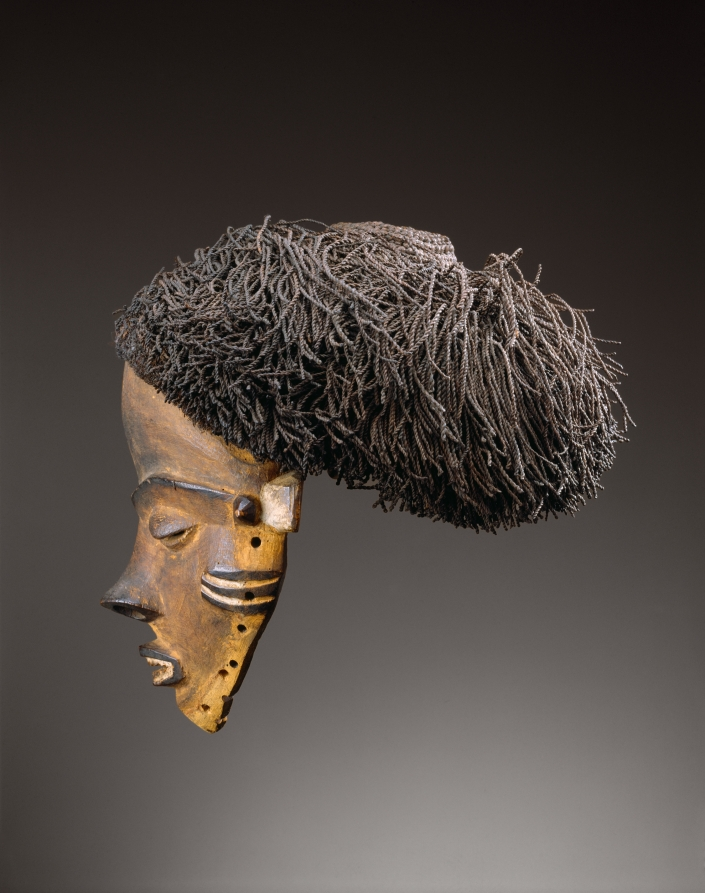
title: Female Mask (Gambanda or Kambanda)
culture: Africa, Central Africa, Democratic Republic of Congo, Pende-style maker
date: early 1900s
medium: Wood, plant fiber, and colorant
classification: Mask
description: Realized in typical Central Pende style, this mask is believed to represent gambanda, the chief's wife. In light of Pende theories about gender and physiognomy, the mask is an ideal expression of a woman's facial features and thus reflects her calm, obedient, peaceful, and self-controlled demeanor. The intricate hairstyle consisting of hundreds of miniature twists imitates a once fashionable hairdo. Pende sculptors inherited their position and often worked on the outskirts of the village so that few could see them at work.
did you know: This female mask would have performed in a collective multimedia event with audience participation.